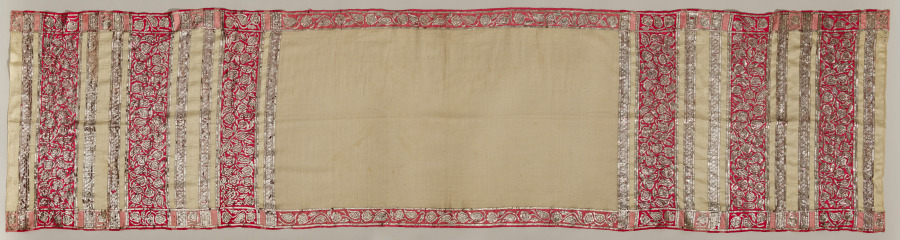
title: Scarf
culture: Africa, North Africa, Algeria, Algerian weaver and embroiderer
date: early 1900s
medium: Silk, metal strips, linen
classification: Embroidery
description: An Algerian weaver used alternating red and white silk wraps and wefts (vertical and horizontal threads) to create a checkerboard pattern of deep reds, solid white, and light pink sections on this textile. The central portion is woven of a different material, potentially linen. An embroiderer used large amounts of flat metal strips to create floral designs that shimmer brightly.